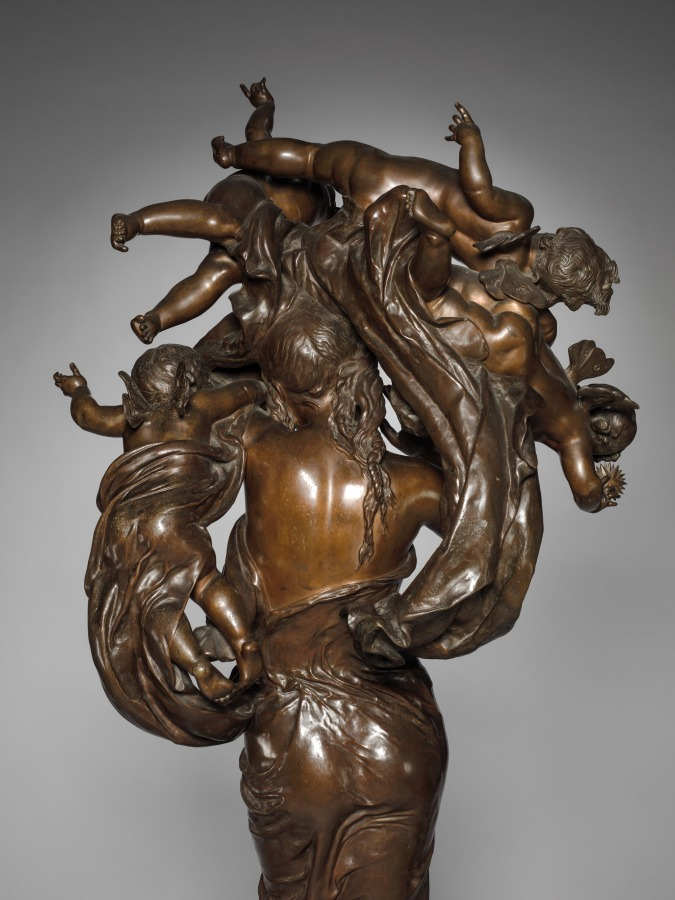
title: Dawn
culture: France, 19th century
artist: Gustave-Joseph Chéret (French, 1838–1894)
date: c. 1883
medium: bronze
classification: Sculpture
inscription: signed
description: This sculpture is of the same design as one exhibited by Chéret at the Paris Salon of 1883.